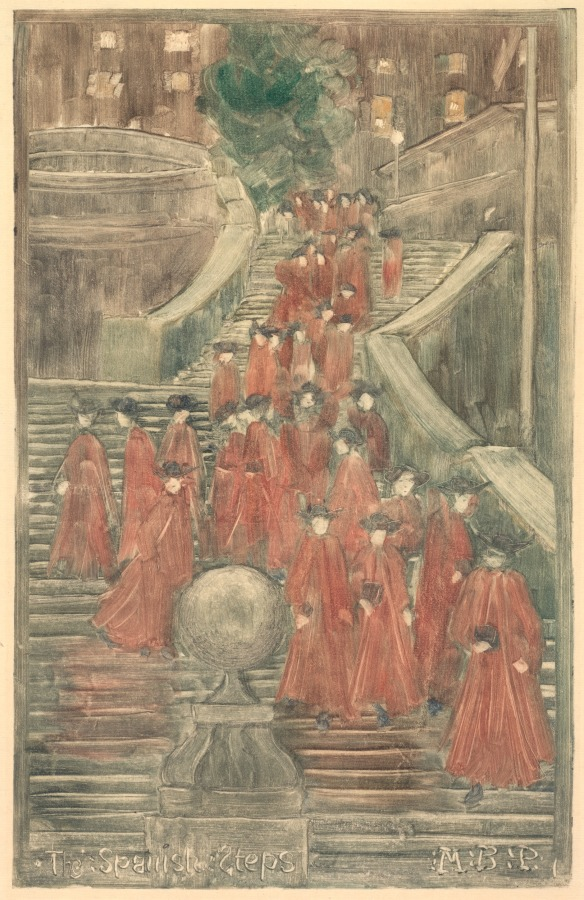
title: The Spanish Steps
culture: America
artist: Maurice Prendergast (American, born Newfoundland [now Canada], 1858–1924)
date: 1898–99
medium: color monotype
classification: Monotype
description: Executed during Prendergast's first trip to Italy, he selected a classic Roman tourist site, theatrical with its sweeping curves, and depicted three dozen red-robed Catholic seminarians flowing down the carefully delineated monumental staircase.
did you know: Maurice Prendergast became influenced by Impressionism after studying for two years in Paris during the 1880s.